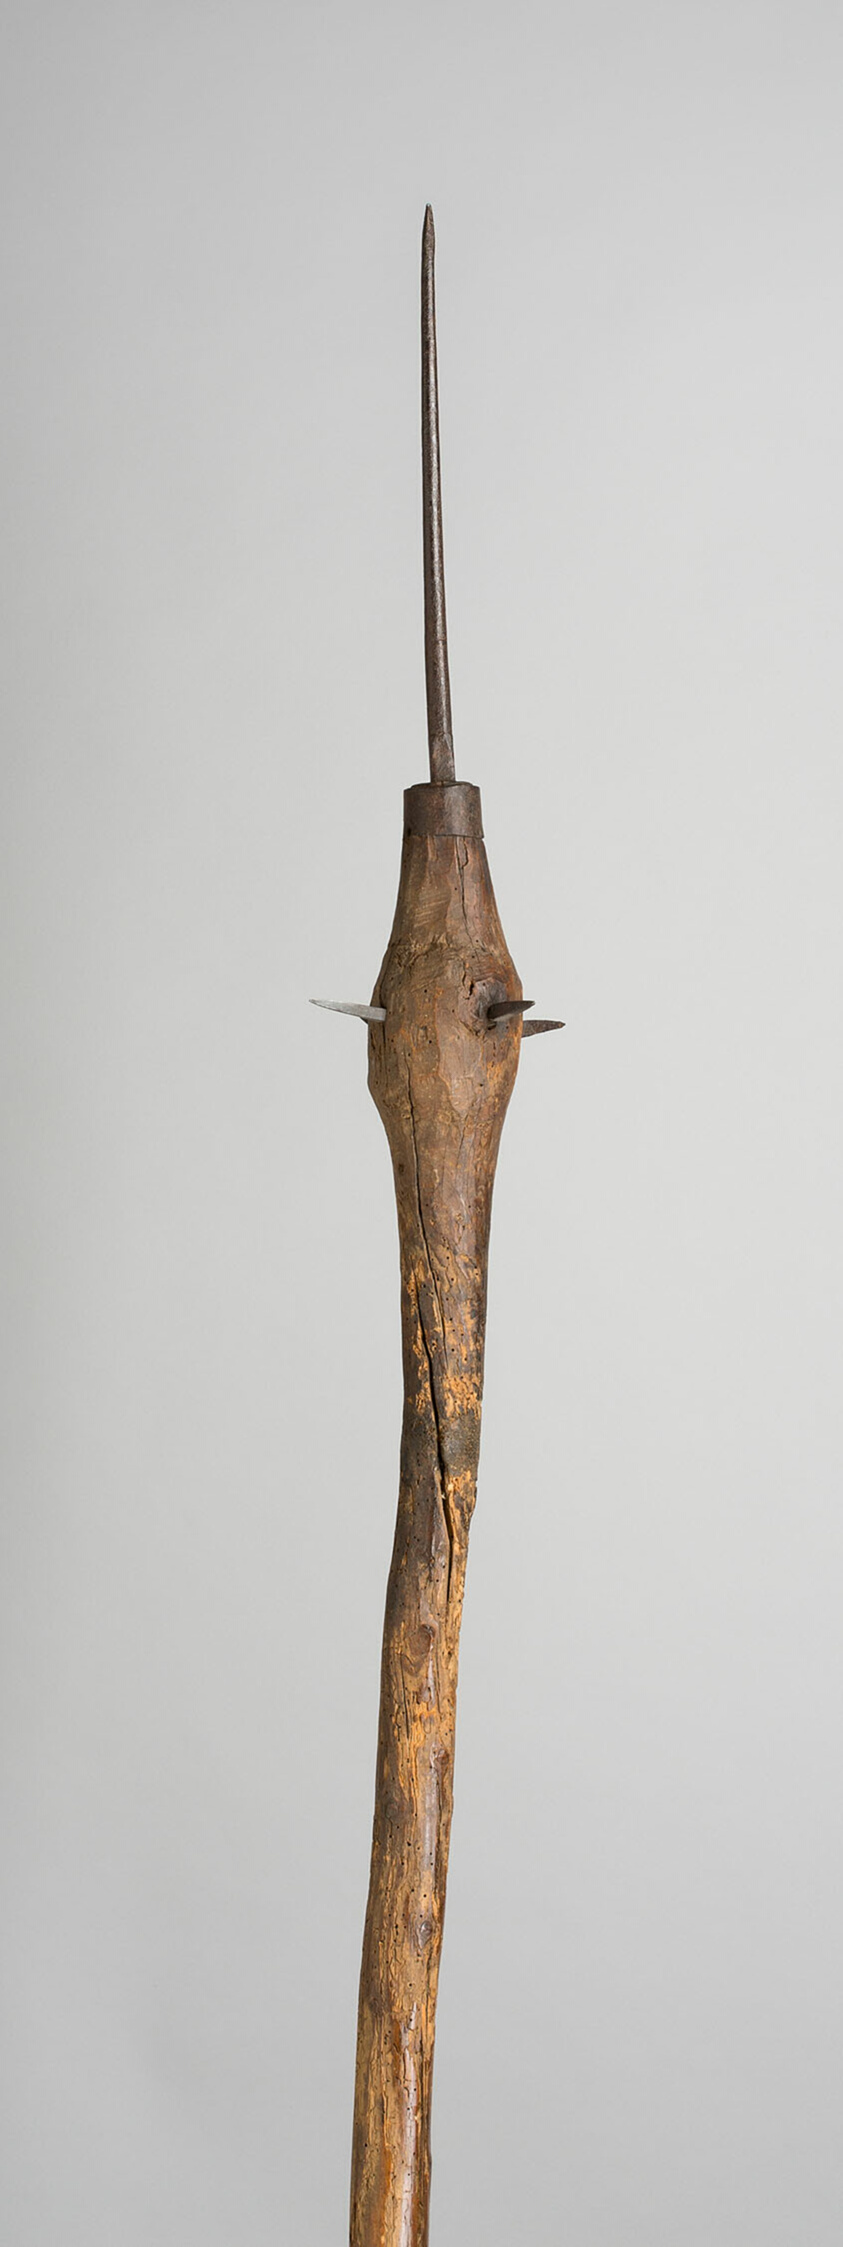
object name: Arms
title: Morgenstern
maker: Swiss or Austrian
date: 1600-75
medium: Iron and wood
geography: Switzerland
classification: edged weapon-staff; arms; arms and armor